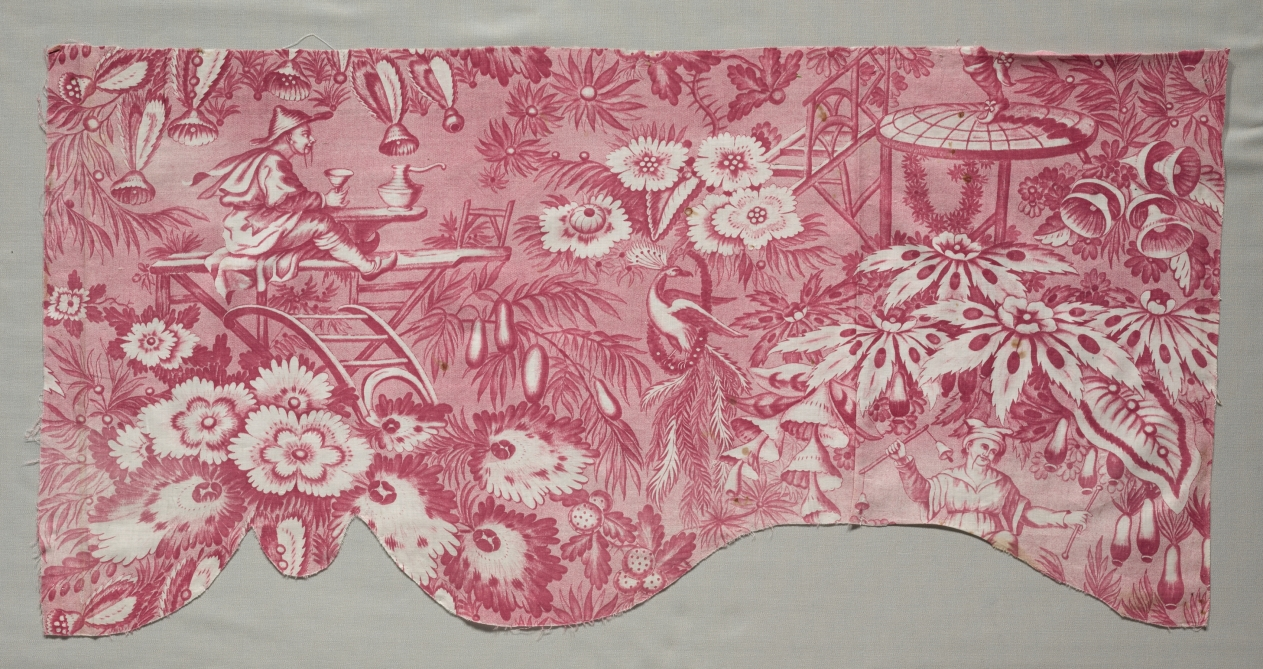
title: Copperplate Printed Textile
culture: France, 19th century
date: early 1800s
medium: copperplate printed cotton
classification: Textile